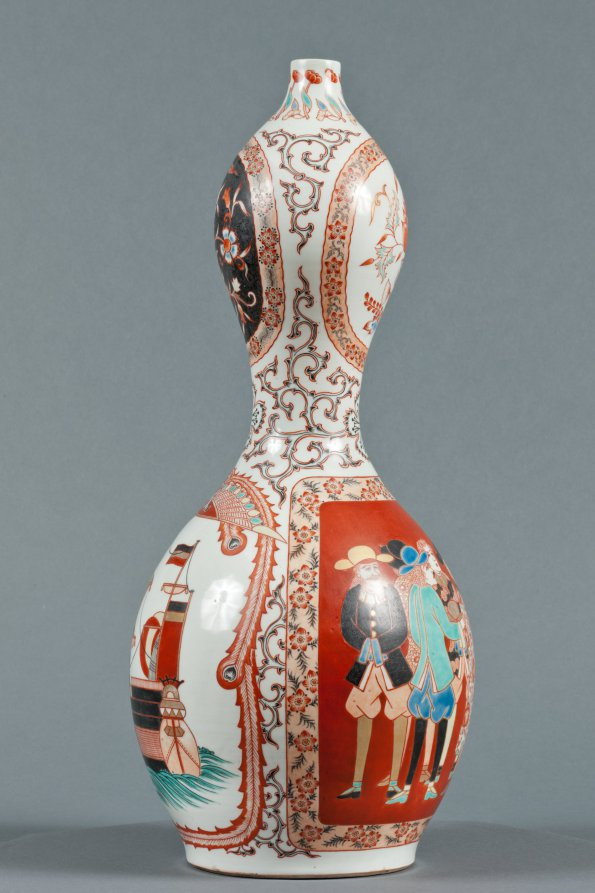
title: Bottle with Western Ships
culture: Japan, Edo period (1615–1868)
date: c. 1800–1868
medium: Porcelain with decoration in colored enamels and underglaze blue, overglaze enamels, and gold (Hizen ware, Arita type)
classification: Ceramic